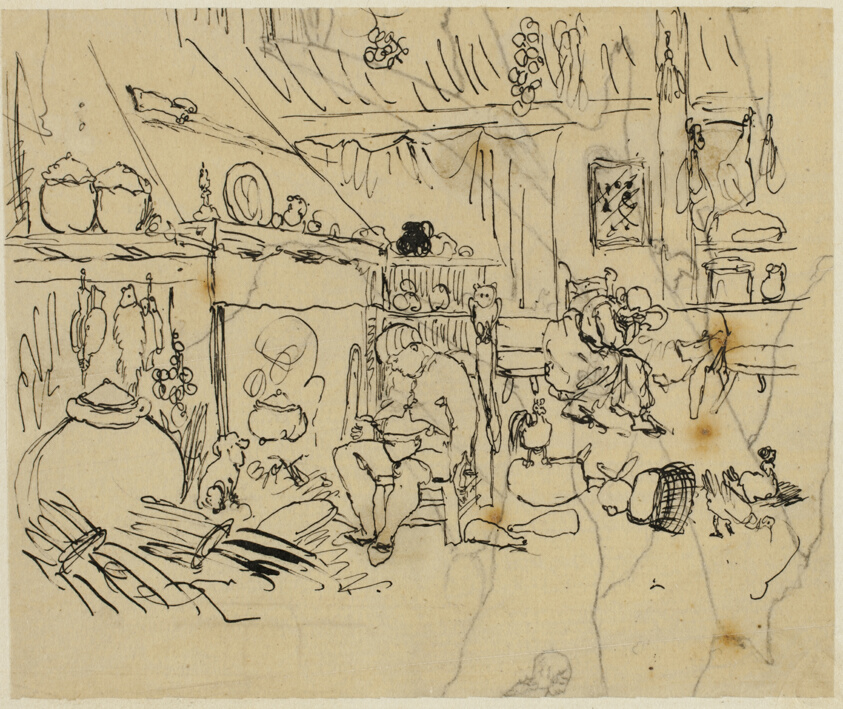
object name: Drawing and Watercolor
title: Misery at Home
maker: Rodolphe Bresdin (French, 1825-1885)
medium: Pen and black ink over graphite, on tan tracing paper, laid down on cream wove paper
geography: France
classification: pen and ink drawings; drawings (visual works); prints and drawing